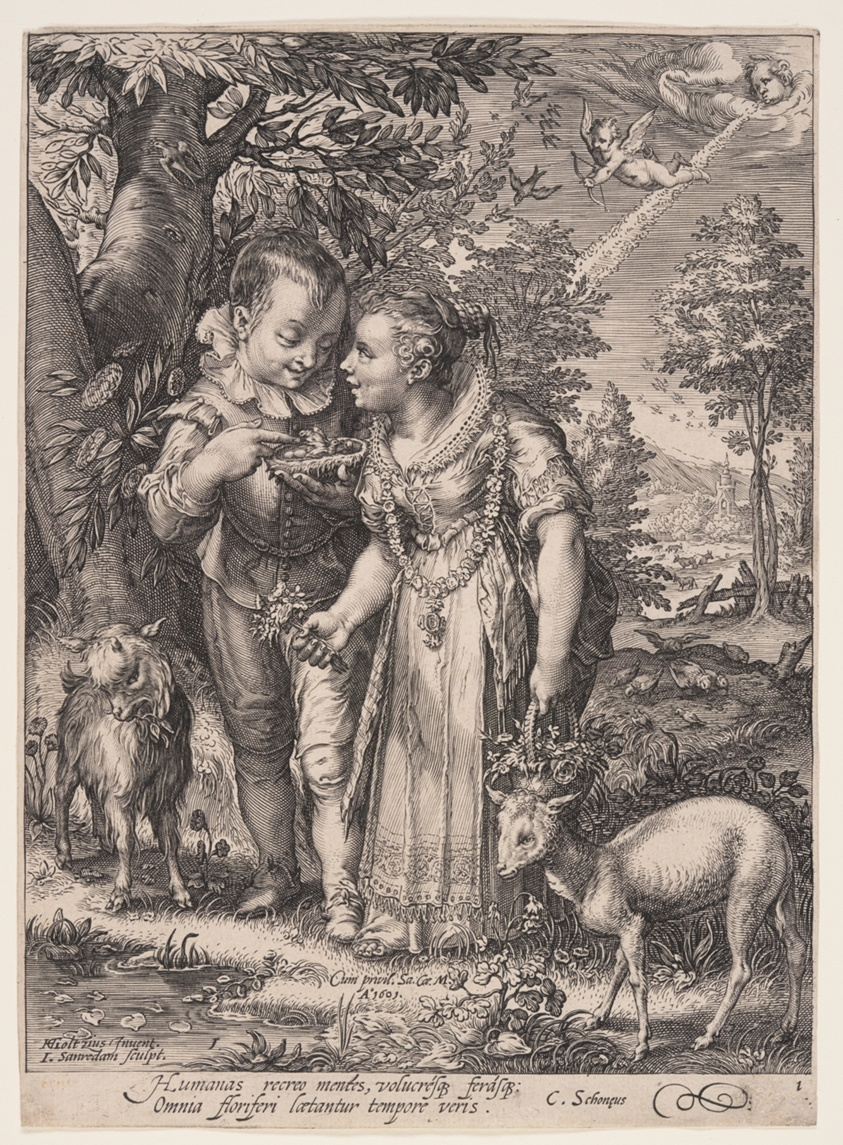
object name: Print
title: Spring (Two Children Playing with Bird), from The Four Seasons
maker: Jan Saenredam (Dutch, 1565–1607); after Hendrick Goltzius (Dutch, 1558–1617)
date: 1601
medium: Engraving on laid paper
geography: Netherlands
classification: print; engraving; paper; prints and drawing